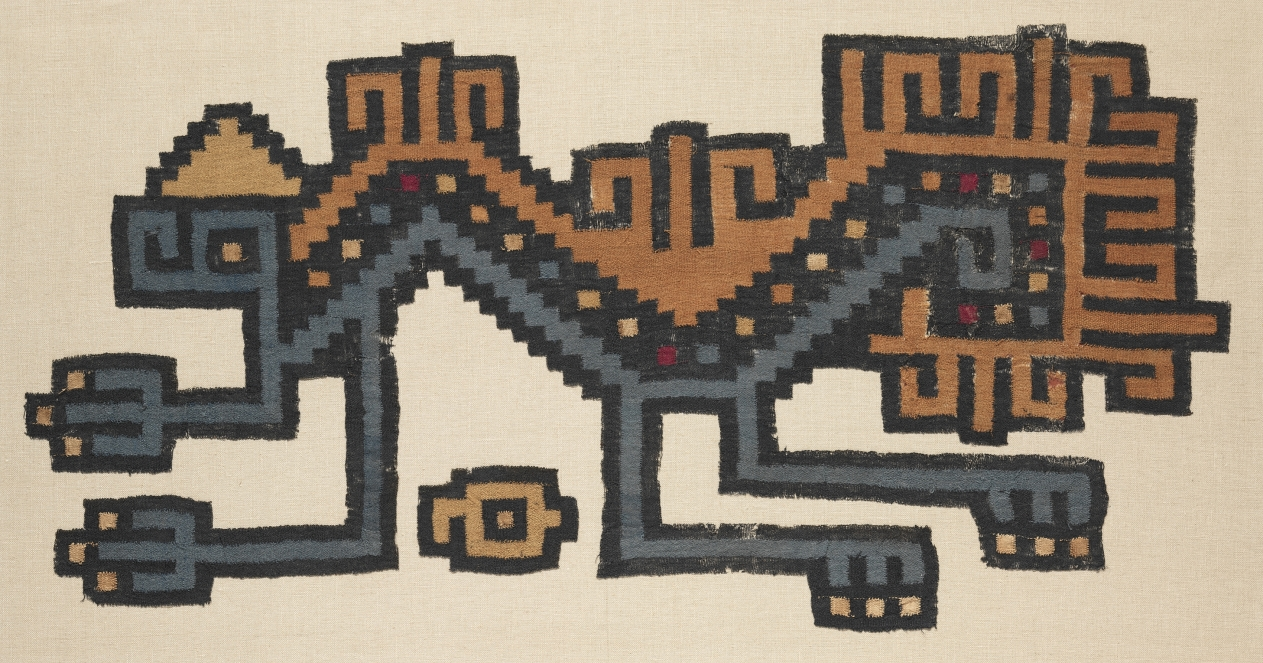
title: Fragment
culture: Peru, South Coast, Nasca-Huari style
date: c. 600–700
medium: interlocking warp and weft: wool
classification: Textile